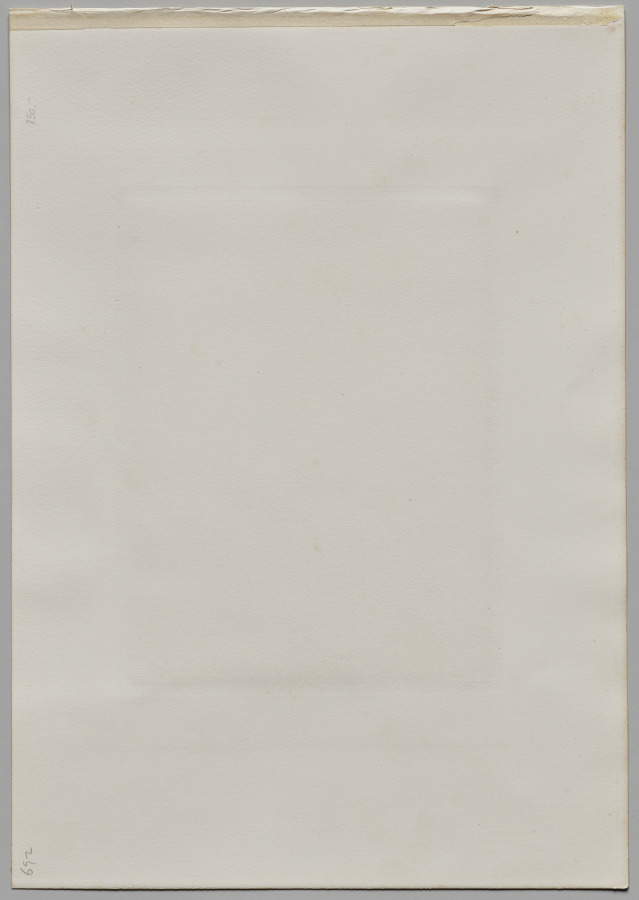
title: The Village of Horning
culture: England , 19th century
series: Life and Landscape on the Norfolk Broads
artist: Peter Henry Emerson (British, 1856–1936)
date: 1886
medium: platinum print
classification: Photograph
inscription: Imprinted on paper sheet adhered to verso of mount: “PLATE V./THE VILLAGE OF HORNING”